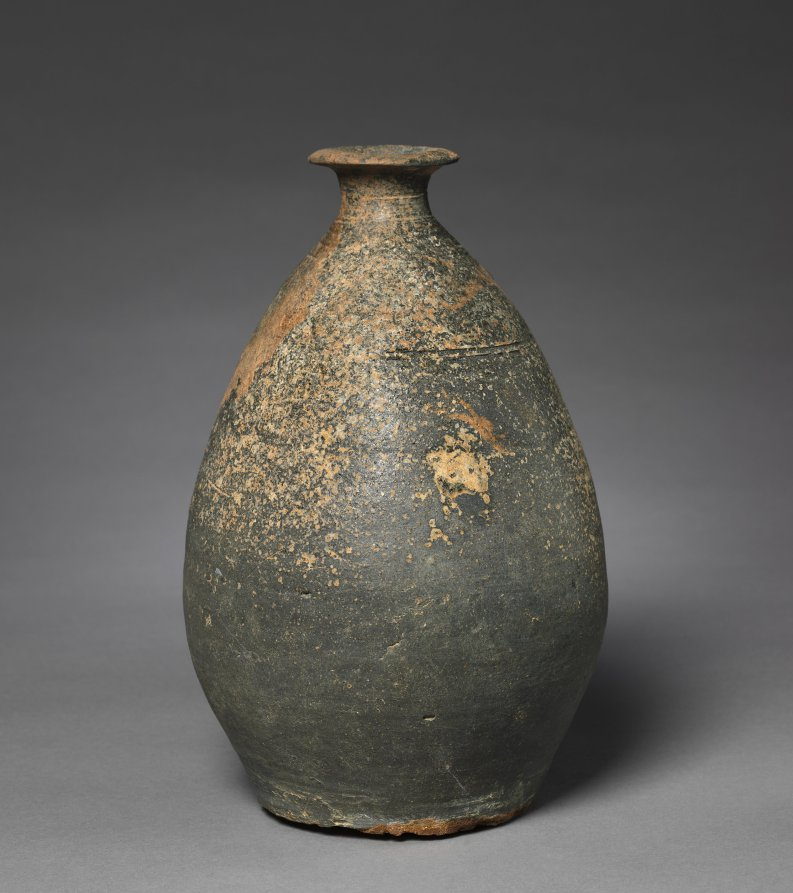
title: Bottle with a Flattened Side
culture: Korea, late Unified Silla (676-935) or early Goryeo (918-1392) period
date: 700s–800s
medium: stoneware with incised designs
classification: Ceramic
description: By the 700s, this type of bottle started to be produced as a utilitarian vessel and was enjoyed among ruling elites. The flattened example like this may have served as a portable wine bottle.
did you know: Its gray color and shimmering glaze both are the result of the reduction of oxygen in the closed kiln chamber built on hillsides.